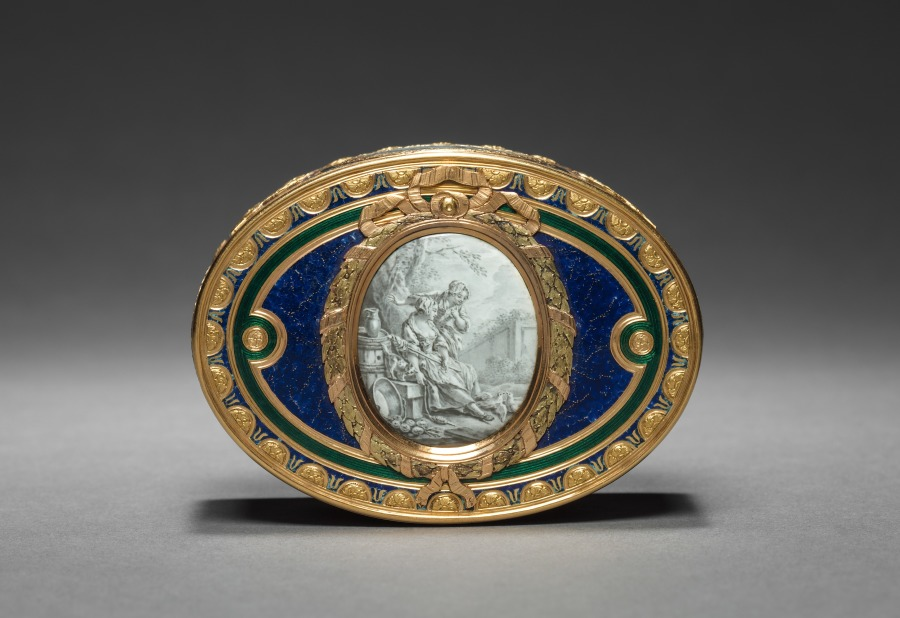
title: Snuff Box (Tabatière) with Portrait of Marie Antoinette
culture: France, 18th century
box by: Pierre-François-Mathis de Beaulieu (French)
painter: François Dumont (French, 1751–1831)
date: 1768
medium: watercolor on ivory in a gold and enamel box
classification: Enamel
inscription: [Maker's mark of Pierre-François-Mathis de Beaulieu, master goldsmith in 1768, inside cover]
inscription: [Charge mark of Jean-Jacques Prévot, 1762-1768, inside cover]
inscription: [Warden's mark of Paris, 1768-1769, inside cover]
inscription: [Discharge mark of Julien Alaterre, Paris, 1768-1774, on neck at right]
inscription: [Inside box, the letter]: "F"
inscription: [On bezel at left, engraved number]: "627"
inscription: [On front of bezel, engraved signature]: "Ve Georges Beaulieu à Paris"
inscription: [On right of miniature portrait, the letter]: "D"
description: This box was created through the collaboration of two skilled and well-known artisans of the period, master goldsmith Pierre-François-Mathis de Beaulieu and celebrated miniature painter François Dumont. The portrait of Marie Antoinette on the box's lid is painted in Dumont’s own style while those on the sides and bottom of the box take inspiration from the work of painter François Boucher, known for his pastoral scenes in the Rococo style.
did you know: Marie Antoinette, queen consort of French King Louis XVI and great patron of the decorative arts, was executed in 1793 at the end of the French Revolution.